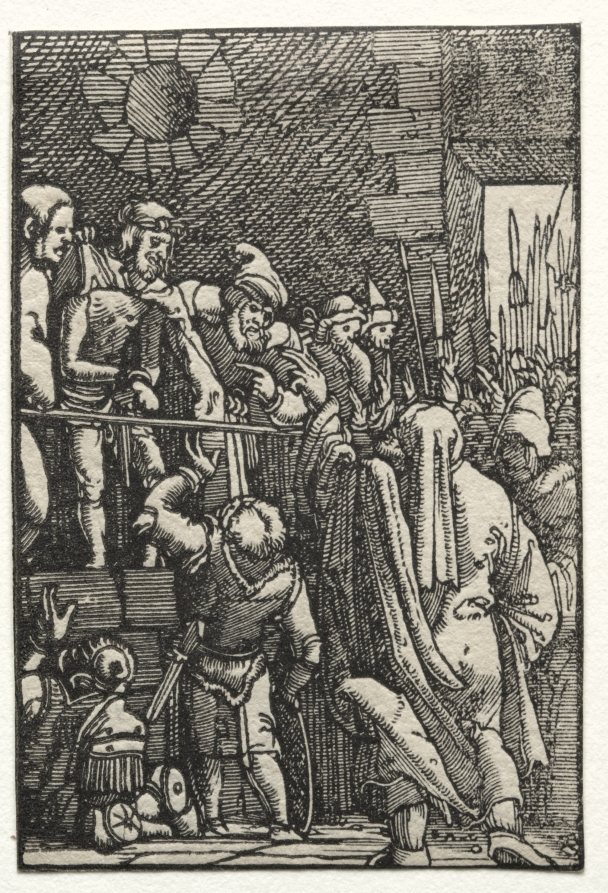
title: The Fall and Redemption of Man: Ecce Homo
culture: Germany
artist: Albrecht Altdorfer (German, c. 1480–1538)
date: c. 1515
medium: woodcut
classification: Print